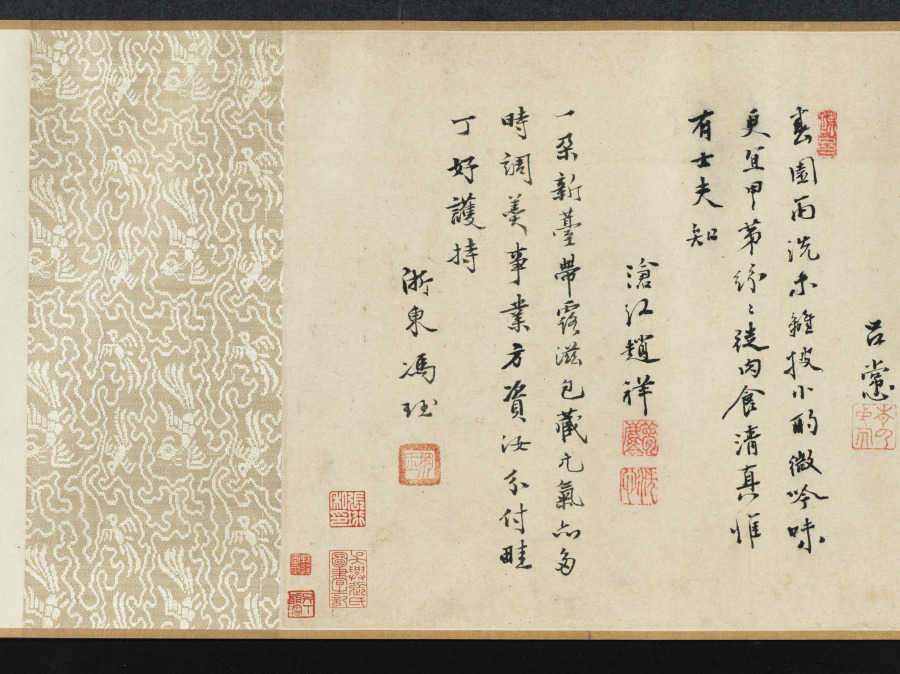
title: Chrysanthemums and Cabbage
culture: China, Ming dynasty (1368–1644)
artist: Tao Cheng (Chinese, active c. 1471–after 1502)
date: c. 1486 or before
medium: handscroll, ink and slight color on paper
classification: Painting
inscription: Artist's seal at beginning of painting: Yun hu 雲湖. Title by Wang Wenzhi 王文治 (1730–1802), date 1756. 2 seals of Wang Wenzhi 王文治 (1730-1802); 3 seals of Ku Yün (n. d.)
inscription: Section A (Chrysanthemums): 1 poem and 1 seal of Zhang Yuanzhen 張元禎 (1437–1507) - Jinshi, 1461; 1 poems and 3 seals of Ni Yue 倪岳 (1444–1501) - Jinshi, 1464; 1 poems and 2 seals of Zhao Xiang 趙祥 (life dates unknown) - Jinshi, 1469; 1 poems and 1 seals of Wu Xixian 吳希賢 (1437–1489) - Jinshi, 1464; 1 poems and 1 seals of Lü Chang 呂㦂 (1449–1511) - Juren, 1471; 1 poems and 3 seals of Fu Han 傅瀚 (1435–1502) - Jinshi, 1464; 1 poems and 1 seals of Feng Jue 馮珏 (life dates unknown) - Jinshi, 1478.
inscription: Chrysanthemums section, poem 1, by Zhang Yuanzhen 張元禎 (1437–1507): Several bushes of chrysanthemums grow in front of the Five-Willow Cottage,/ The yellow ones are really yellow and the white ones white./ This affable and decent fellow, young in years and unsophisticated,/ Has snapped one of the branches to dip in ink. (The Five-Willows Cottage was the home of the poet Tao Qian 陶潛 (Tao Yuanming 陶淵明, AD 365-427).) Chrysanthemums section, poem 2, by Ni Yue 倪岳 (1444–1501): Where at the Eastern Fence can you grieve for the Soul of the Xiang River?/ A man of upright character is mourned within the traces of ink./ White jade with a slight flaw would be a grievance forever,/ Later men should understand why even the roots of the flowers are washed. (Eastern Fence refers again to the poet Tao Qian 陶潛, while the Soul of the Hsiang River refers to the poet Qu Yuan 屈原 (c. 340–278 BC).) Chrysanthemums section, poem 3, by Zhao Xiang 趙祥 (life dates unknown): A clump of chrysanthemum grows in front of the bamboo pavilion,/ The winds of many autumns have blown since we parted beyond the river./ Straining wine through the official's cap of Tao [Qian] to prolong autumn's pleasures,/ The mists and clouds of ten thousand miles belong to the intoxicated. Chrysanthemums section, poem 4, by Wu Xixian 吳希賢 (1437–1489): It is a different spring if mulberry is planted during the latter part of the year,/ The dust of the world originally did not drop on clothing./ Who spills out ink under the Eastern Fence/ And paints so freely this portrait of chrysanthemums for the venerable Sir Tao? Chrysanthemums section, poem 5, by Lü Chang 呂㦂 (1449–1511): This full tray of ink for painting [flowers] at the Eastern Fence;/ Their whiteness or yellowness is not essential in capturing their beauty./ I don't have to go to Jiangnan to see them myself./ At my old house grow two or three branches. Chrysanthemums section, poem 6, by Fu Han 傅瀚 (1435–1502): Who daubed autumn flowers with ink/ As if they were dark dew on a branch tip only vaguely seen at evening?/ After the lazy clouds disperse, no one paints;/ A certain unconventionality pervades this painting. Chrysanthemums section, poem 7, by Feng Jue 馮珏 (life dates unknown): To satisfy his hunger, [the chrysanthemums] have at times entered the poetry of Qu Yuan;/ Taking up the wine cup, it felt close to Tao Qian./ [With them I am like] a lonely root sustained by deep water/ Or an old man to whose hair the color of youth returns.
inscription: Section B (Cabbage): 1 poem and 1 seal of Cai Qi 蔡圻 (life dates unknown) - degree information not known; 1 poems and 3 seals of Ni Yue 倪岳 (1444–1501) - Jinshi, 1464; 1 poem and 3 seals of Jiao Fang 焦芳 (1436–1517) - Jinshi, 1464; 1 poem and 3 seals of Li Dongyang 李東陽 (1447–1516) - Jinshi, 1464; 1 poems and 1 seals of Wu Xixian, signed “Xixian” 吳希賢 - Jinshi, 1464; 1 poems and 3 seals of Fu Han 傅瀚 (1435–1502) - Jinshi, 1464; 1 poems and 1 seals of Lü Chang 呂㦂 (1449–1511) - Juren, 1471; 1 poems and 2 seals of Zhao Xiang 趙祥 (life dates unknown) - Jinshi, 1469; 1 poems and 1 seals of Feng Jue 馮珏 (life dates unknown) - Jinshi, 1478.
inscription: Cabbage section, poem 1, by Cai Qi 蔡圻 (life dates unknown): The ink splashes are fresh from a frosty brush dipped in pond water;/ I can visualize that time when Yunhu 雲湖 [Tao Cheng] first showed his talents./ I lament the places where I scribbled before,/ Who would open them to inscribe a poem? (The first line is an allusion to the famous Jin dynasty calligrapher Wang Xizhi 王羲之 (AD 303-361), who practiced calligraphy so diligently at the edge of a pond that the water turned black with ink.) Cabbage section, poem 2, by Ni Yue 倪岳 (1444–1501): After rain the vegetables begin to grow;/ How are the colors of the masses lately!/ Once you get used to them, the tastiest parts are the ends of the roots;/ I don't know if they can be used for "seasoning soup." ("Seasoning soup" is an allusion to the statesmanship of a chief minister.) Cabbage section, poem 3, by Jiao Fang 焦芳 (1436–1517): This crop of purple stalks and green leaves is late and irregular;/ Now the rainy season is over for the Eastern Garden./ All the nobles nowadays dine on meat;/ Who of them knows the flavor of this [cabbage]. Cabbage section, poem 4, by Li Dongyang 李東陽 (1447–1516): It's always helped the honest man to sober up after drinks./ I intend to go to the deepest part of the stream-crossed garden/ To refresh myself in the fragrance and dew of evening. Cabbage section, poem 5, by Wu Xixian 吳希賢 (1437–1489): After rain, the white silk is filled with fragrant vegetables;/ How many times this happens in Mr. Tao's paintings./ On whom will you depend to present a memorial to the ruler?/ Don't let this color emerge on the faces of the people. (The last line is meant as a warning to officials: the color of the vegetables (green) may be pleasing in itself, but when it emerges on the faces of the starving poor, it signifies a badly governed world.) Cabbage section, poem 6, by Fu Han 傅瀚 (1435–1502): For twenty years I have feasted on the excellent mutton of an official;/ Yet I talk and dream about the garden and its vegetables./ Do not merely say it is good to chew the root of the cabbage--/ You must taste to understand what poverty is. Cabbage section, poem 7, by Lu Chang 呂㦂 (1449–1511): The capital is never a place for an apprentice in the "garden of scholarship."/ Who would write about gardens and vegetables on an examination paper?/ I've walked throughout the country in spring;/ Make sure the people don't show this color. Cabbage section, poem 8, by Zhao Xiang 趙祥 (life dates unknown): After a wash of rain, the spring garden is still in order;/ The flavor [of the cabbage] is more suitable with a small drink and the hum of a tune./ The rich and powerful in their mansions consume dish after dish of meat;/ Vegetarian food is known only by the scholars. Cabbage section, poem 9, by Feng Jue 馮珏 (life dates unknown): A new cabbage is nourished with dew;/ It takes a long time to grow and mature./ The business of "seasoning the soup" is your responsibility;/ Better command the gardener to take care [of the cabbages]. trans. HK/LYSL/WKH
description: On an autumn day in Beijing, Tao Cheng had a gathering with a group of scholar-officials and created two paintings in a spontaneous, casual style. The first depicts chrysanthemums, slender bamboo stalks, and a rock in monochrome ink. Tao applied light colors for the second painting that depicts cabbage. Tao deliberately placed the images on the first sections of the paper so that his honorable guests could add their poetic inscriptions inspired by his imagery. In the first section to the right, all seven poetic inscriptions refer to the beloved poet and recluse Tao Qian (also called Tao Yuanming, AD 365–427) who was particularly known for his profound love for chrysanthemum flowers. Most of the inscriptions in the second section express sympathy for the poor, since cabbage is the main ingredient in their humble food. Taken together, the poems and paintings allude to the life and responsibilities of the scholar-official: the importance of both an upright character and a concern for the poor citizens in order to achieve good government.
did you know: Eminent calligrapher Wang Wenzhi 王文治 was only 27 sui when he wrote the title in 1756.